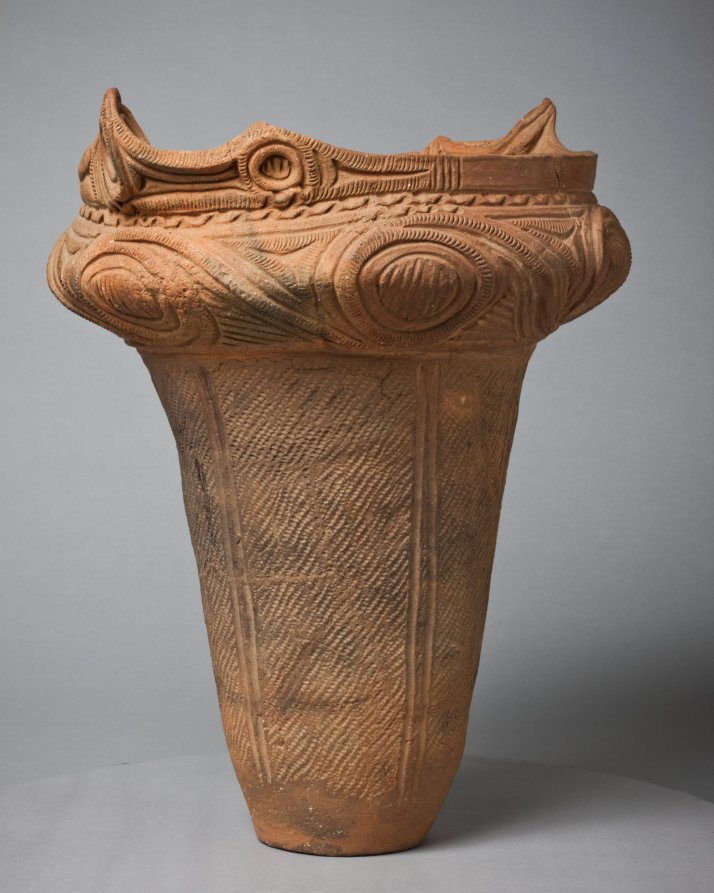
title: Urn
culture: Japan, Jōmon period (c. 10,500–300 BCE)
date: c. 2000 BCE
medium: earthenware, terracotta, impressed and incised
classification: Ceramic